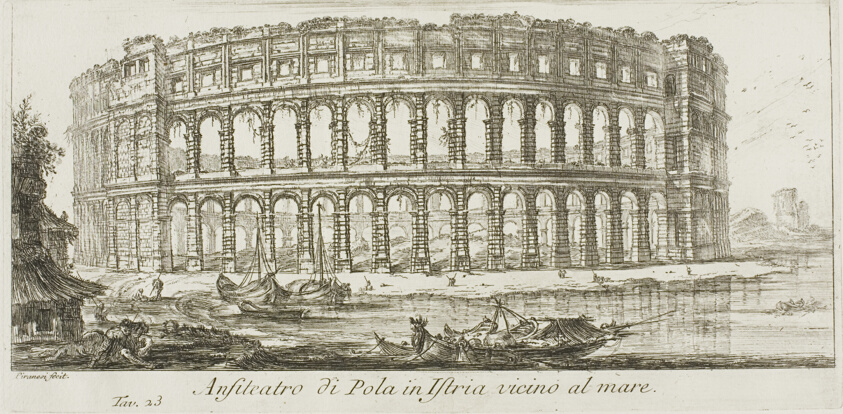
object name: Print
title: Ampitheater of Pola in Istria near the sea, plate 23 from Some Views of Triumphal Arches and other monuments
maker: Giovanni Battista Piranesi (Italian, 1720-1778)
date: 1748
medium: Etching on ivory laid paper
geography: Italy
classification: etching; print; prints and drawing